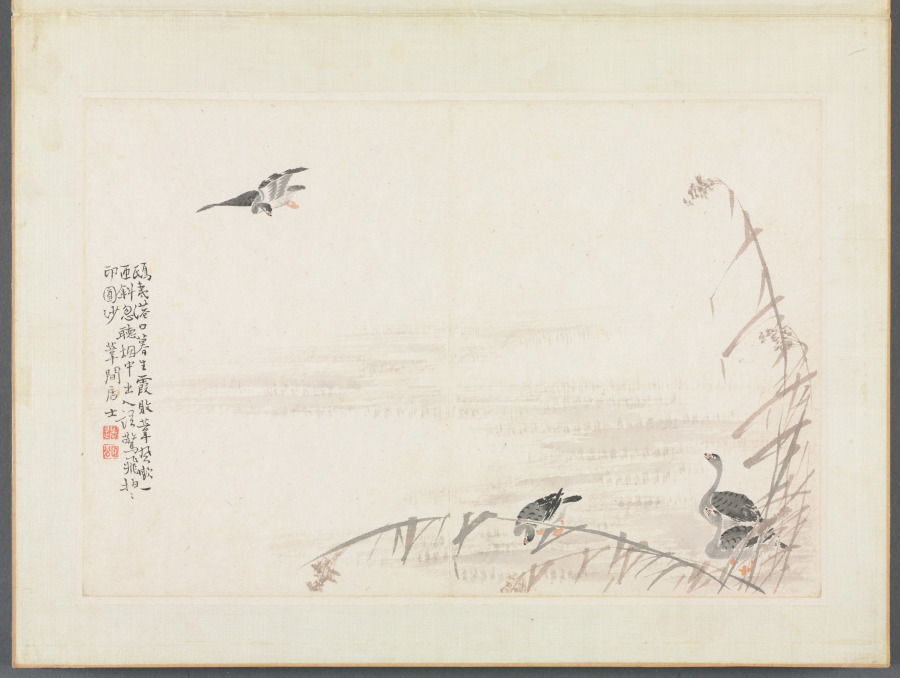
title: Album of Calligraphy and Paintings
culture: China, Qing dynasty (1644-1911)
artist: Bian Shoumin (Chinese, 1684–1752)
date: first half of the 1700s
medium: album leaf; ink and color on paper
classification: Painting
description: The artist Bian Shoumin is known for his depiction of wild geese, water, and reeds. The migrant birds in autumn and winter evoked, in the minds of the Chinese intelligentsia, a time of parting and sorrow.